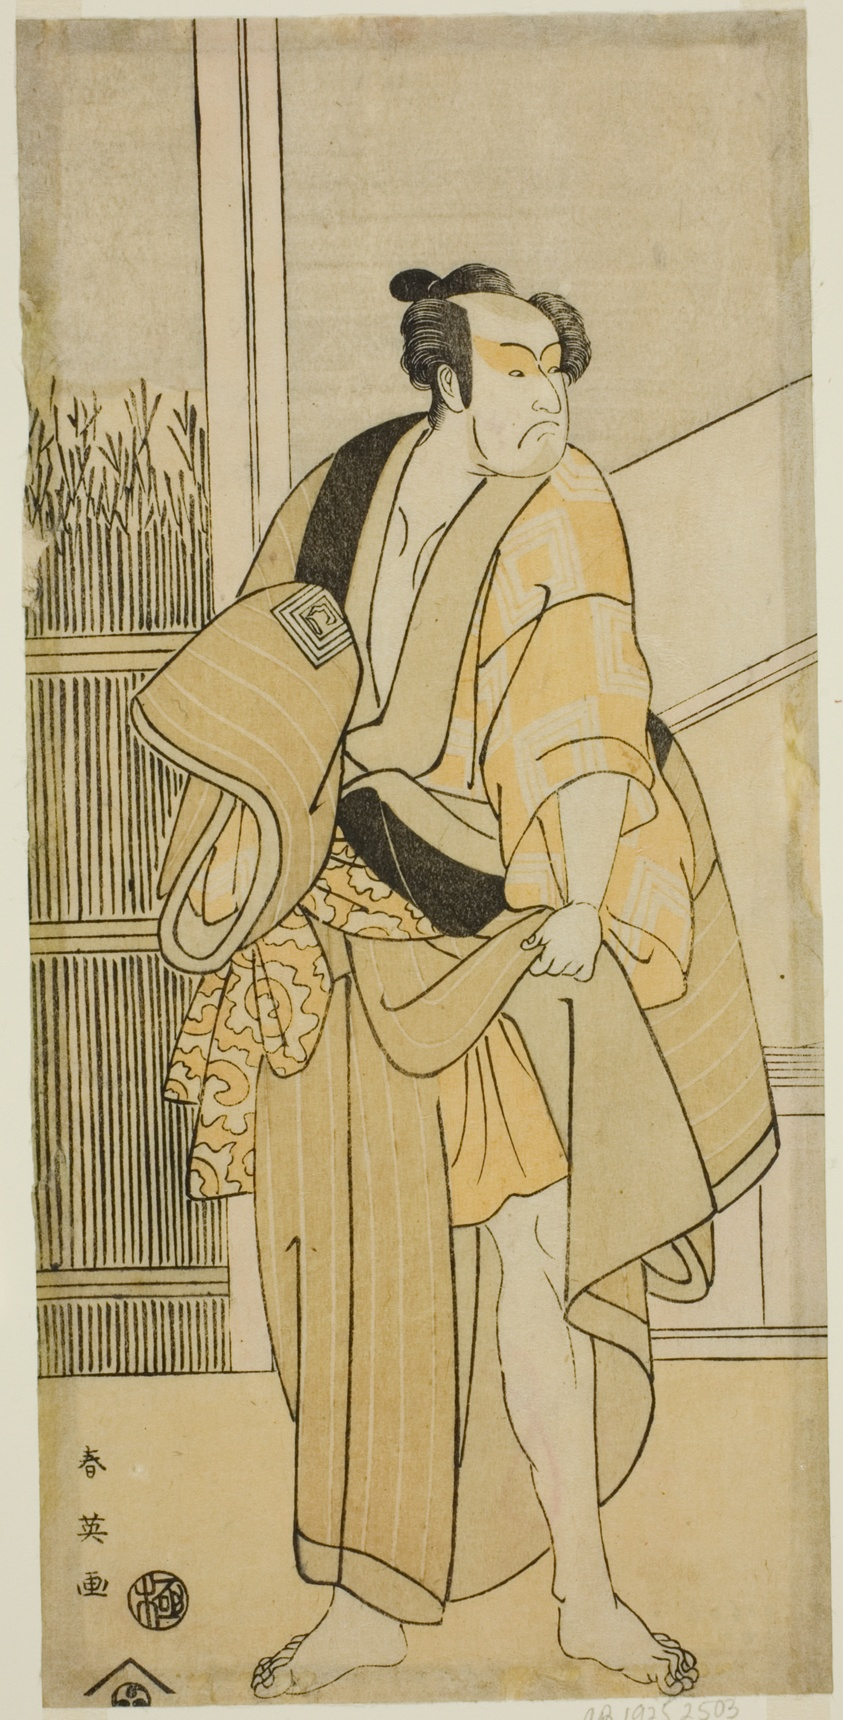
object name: Print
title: The Actor Ichikawa Monnosuke II as Hiranoya Tokubei (?) in the Play Waka Murasaki Edokko Soga (?), Performed at the Ichimura Theater (?) in the Third Month, 1792 (?)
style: Japanese (culture or style)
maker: Katsukawa Shun'ei (Japanese, 1762-1819)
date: c. 1792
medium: Color woodblock print; hosoban; left sheet of triptych (?)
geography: Japan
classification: woodblock print; print; asian art